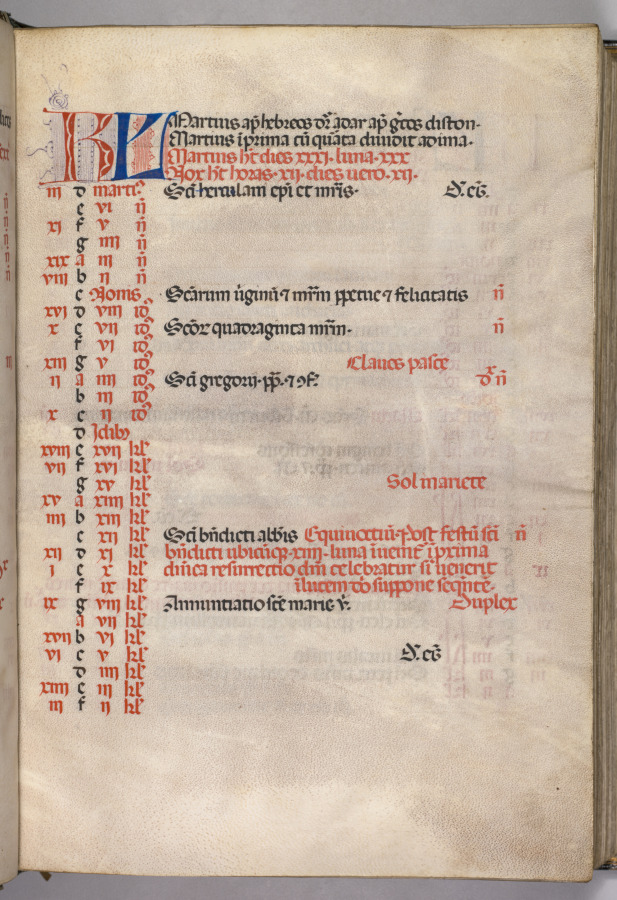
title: Missale: Fol. 4r: March Calendar Page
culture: Italy, Perugia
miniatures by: Bartolommeo Caporali (Italian, c. 1420–1503)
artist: assisted by Giapeco Caporali (Italian, d. 1478)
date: 1469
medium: ink, tempera and burnished gold on vellum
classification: Bound Volume